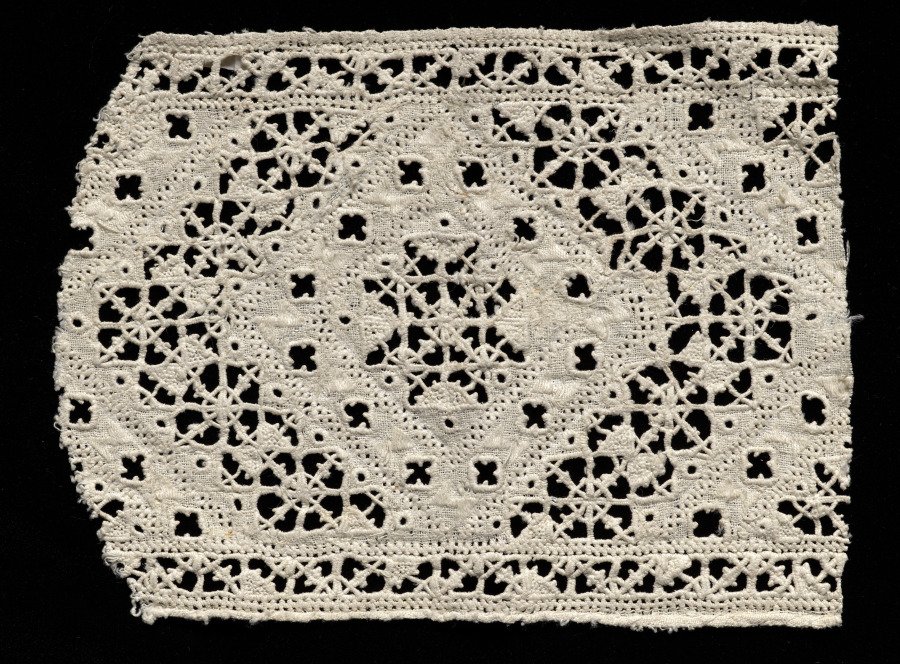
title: Lace fragment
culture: Italy, Venice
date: 1500s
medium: Linen: needle lace (cutwork) insertion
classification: Lace